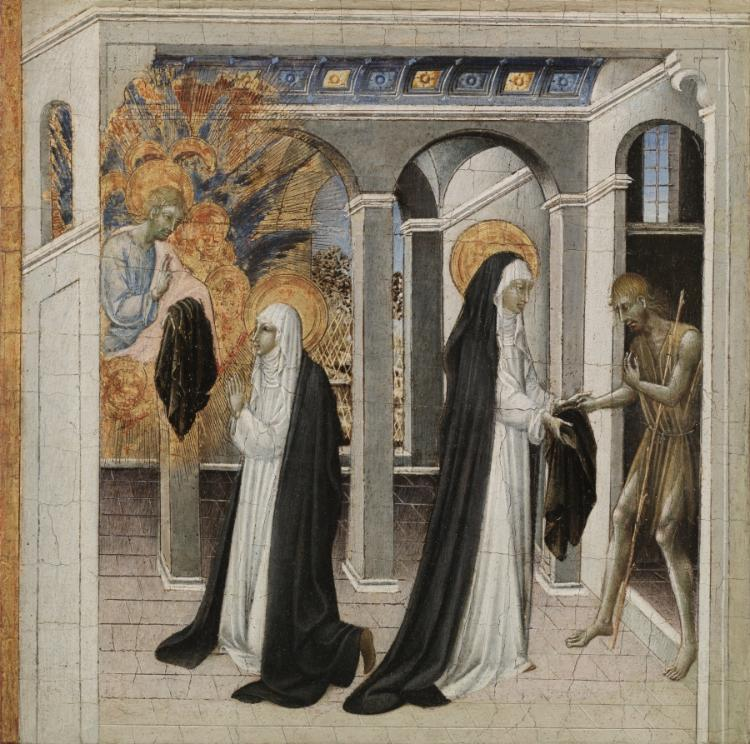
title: St. Catherine of Siena and the Beggar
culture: Italy, Siena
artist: Giovanni di Paolo (Italian, c. 1403–1482)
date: 1460s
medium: tempera and gold on wood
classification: Painting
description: Saint Catherine (1347-1380) was the daughter of a prosperous Sienese cloth dyer. At the age of six, she saw a vision of Christ and thereafter dedicated herself to chastity, penance, and good works. She became much beloved in Siena for selflessly caring for victims of the Black Death. This panel, with 1966.2, was once part of a predella (or pedestal) of a large altarpiece painted for the Hospital Church of Siena. The main scene of this altarpiece, showing the Presentation of Christ in the Temple (now preserved in Siena) was ordered by the Pork Butchers Guild (the Pizzicaiuoli) in 1447. The predella was added later when Catherine was canonized in 1461. In the first panel, she kneels before an altar and reaches up to choose from the monastic garments offered by Saints Dominic, Augustine, and Francis, all founders of religious orders. Catherine takes the habit of Saint Dominic, which she wore as the founder of the Sisters of Penance. The second panel shows, at the right, Saint Catherine giving her cloak to a beggar. The beggar was really Christ in disguise, and at the left returns the cloak to her. For this act of charity, the cloak perpetually protected its wearer from the cold.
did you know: Giovanni di Paolo painted both large altarpieces and small manuscripts.